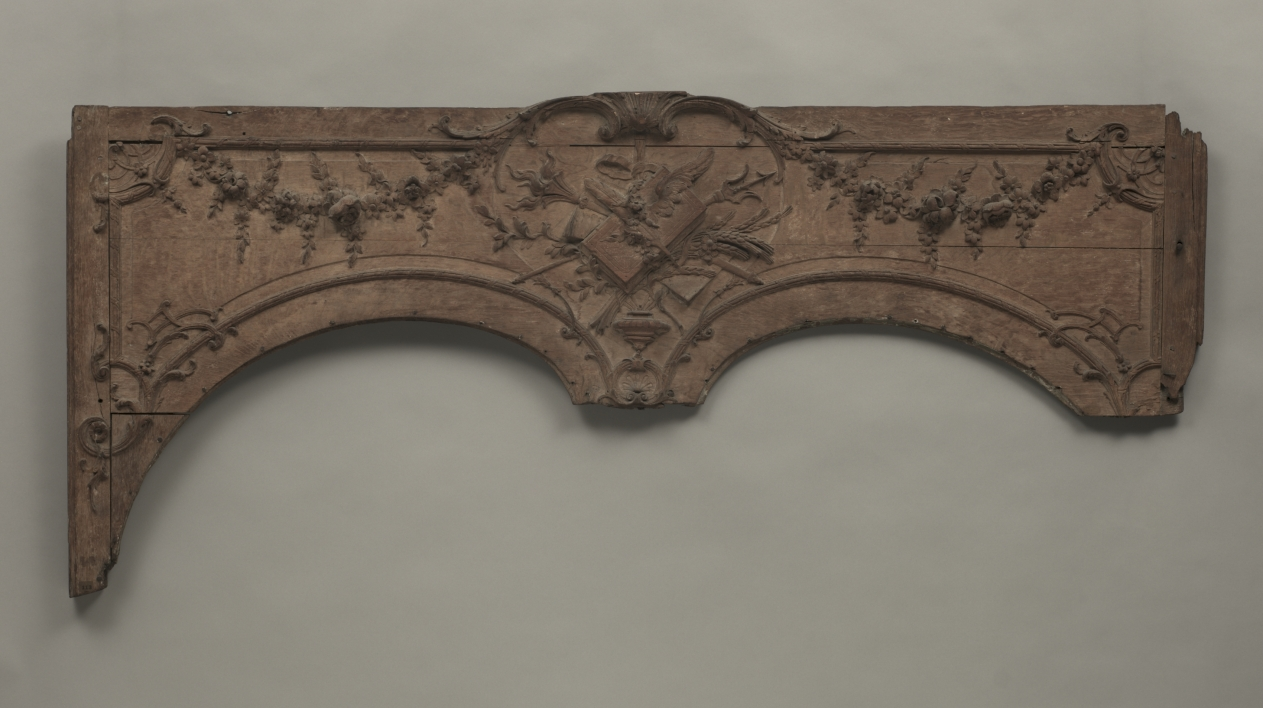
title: Panel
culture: France, Regency Period, 18th Century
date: 1715–1723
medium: wood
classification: Furniture and woodwork